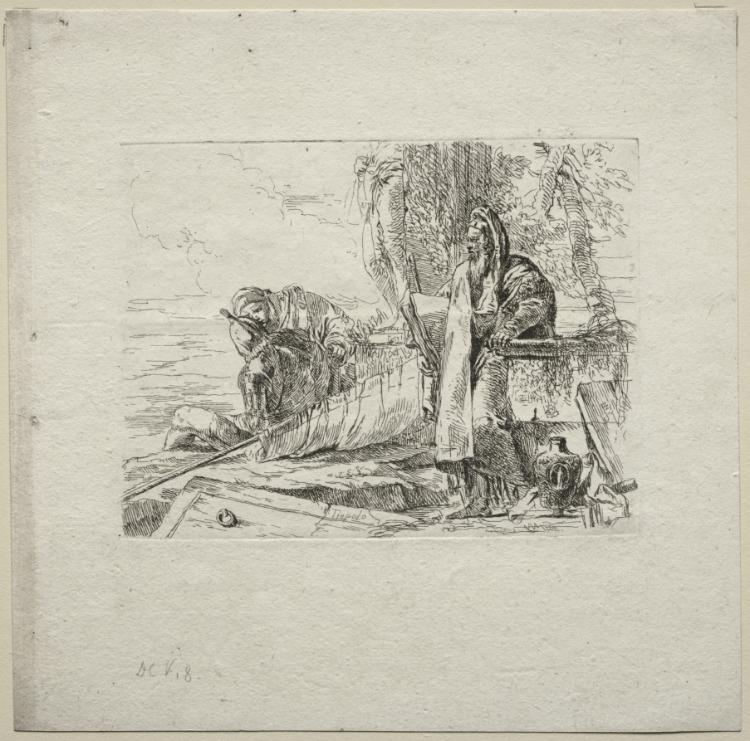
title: Various Caprices: The Philosopher Standing with Book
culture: Italy, 18th century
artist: Giovanni Battista Tiepolo (Italian, 1696–1770)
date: 1735–50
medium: etching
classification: Print